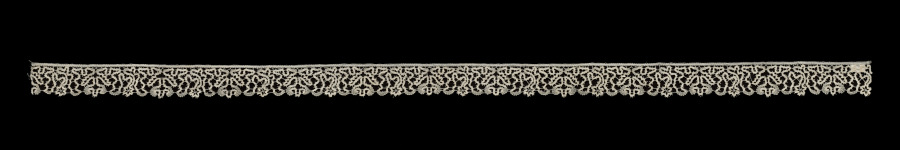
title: Lace Edging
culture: France or Flanders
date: early 1900s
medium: Bobbin lace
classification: Lace